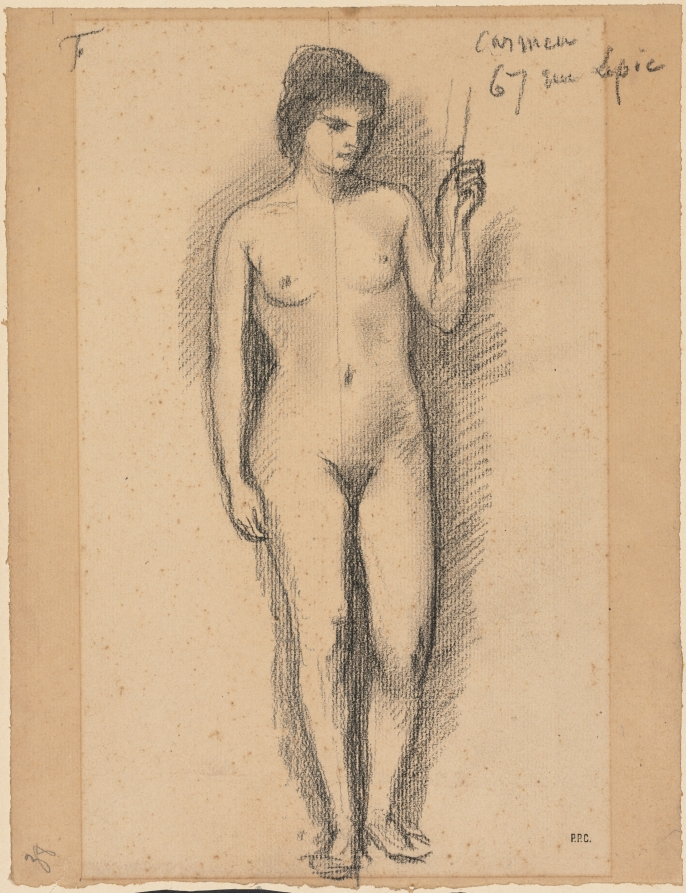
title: Carmen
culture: France, 19th century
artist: Pierre Puvis de Chavannes (French, 1824–1898)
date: last half 1800s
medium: black crayon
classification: Drawing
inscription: by artist, upper left, in black crayon: F ; by artist, upper right, in black crayon: Carmen / 67 [rue ?] Lepic ; lower left, in graphite: 38 ; VERSO OF SECONDARY SUPPORT, center, in graphite: D6190 / de mildew / Hinged mat / 252W [sideways] ; lower center, in graphite: Refit [Ge ?] fur / save all old / stickers / 252W